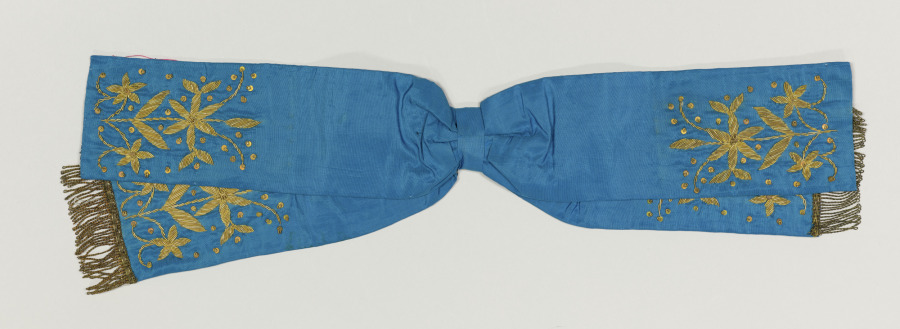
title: Woman's Costume (Blue Silk Band)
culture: Italy, Sicily, 19th century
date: 1800s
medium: silk (blue) with metal thread embroidery and sequins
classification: Garment